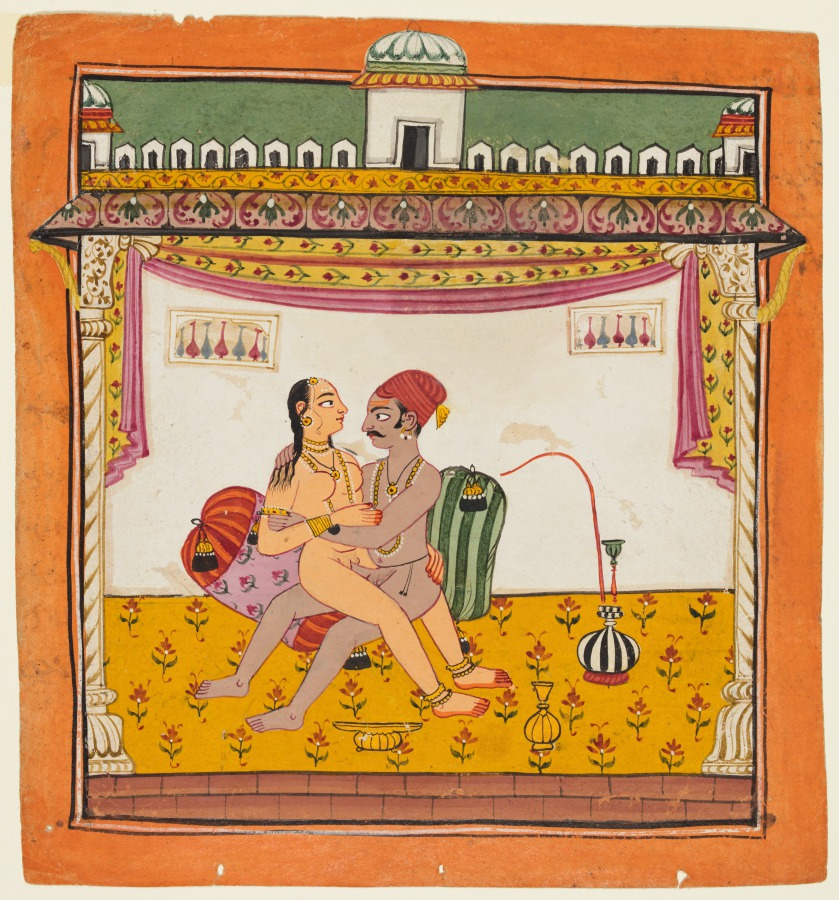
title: A couple seated against two pillows engaged in sex, from an erotic series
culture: Northern India, Pahari kingdoms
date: c. 1700–1710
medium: gum tempera on paper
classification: Painting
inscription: asēm (?)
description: Erotic paintings were commissioned by the patrons of painting, at times for educational purposes, mostly for pleasure. The artists would seek inspiration for the peculiar sexual positions from ancient texts such as Kamasutra and Kokashastra. In the painting, a woman rests on the lap of her paramour while their position is supported by two large bolsters put against the wall.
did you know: Yellow pigment has been used for jewelry instead of gold.